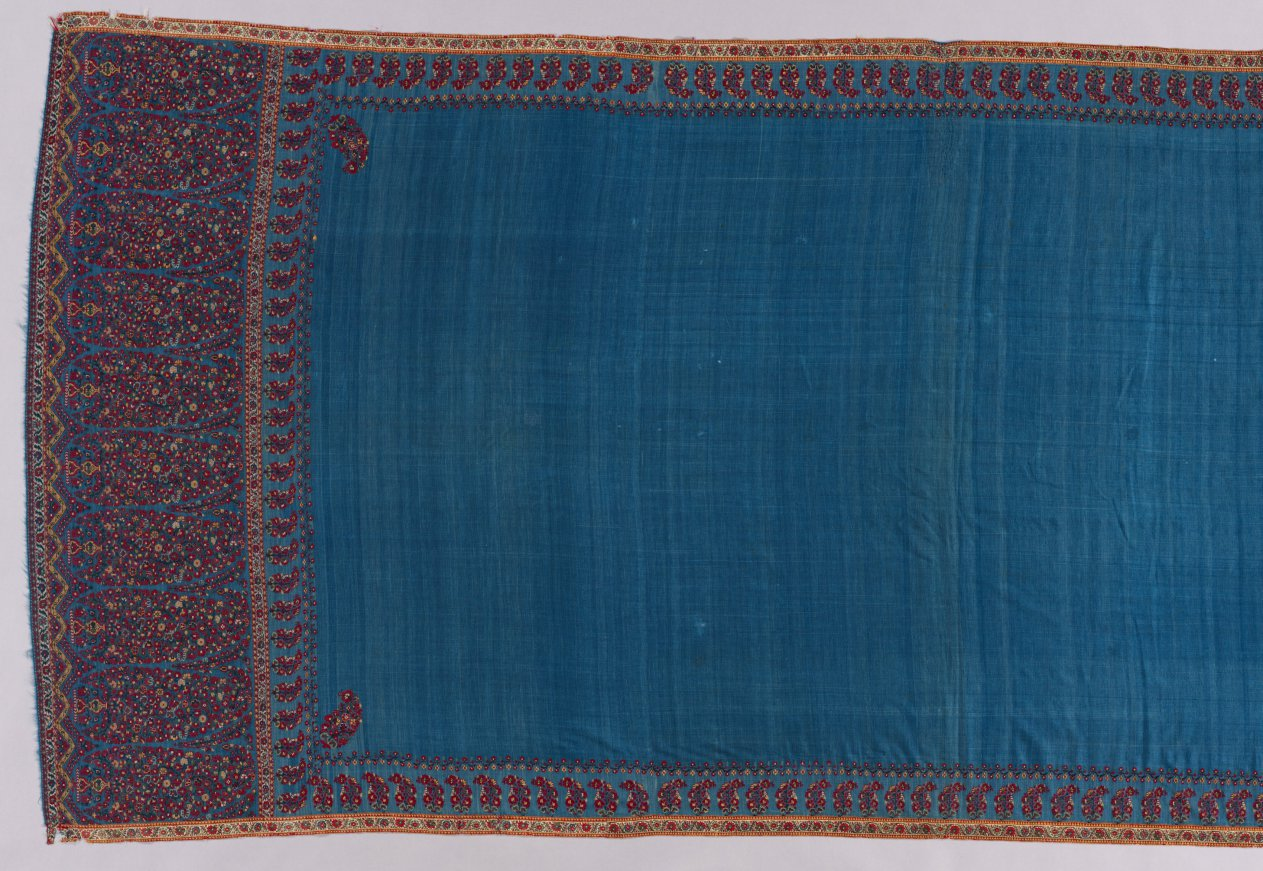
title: Shawl with boteh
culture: India, Kashmir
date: 1820–1830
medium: 2/2 twill tapestry weave, double interlocked: wool, possibly pashmina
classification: Textile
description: Thousands of luxurious shawls imported from Kashmir, India, were status symbols that European-manufactured imitations could not equal. Those woven in Paisley, Scotland, gave rise to the popular term paisley. Their representation in portraits records the evolution of shawl fashions, which helps to date surviving examples. The coveted quality of Kashmir shawls was achieved with luxurious fine goat hair woven in twill tapestry to form small colorful blossoms. Such shawls are lightweight, supple, and warm. A plethora of blossoms arranged in small vases on stands form the large paisley or boteh motifs, while smaller versions enliven the sides of the field. Such floral displays evolved from blossoming plants possibly in 16th-century India.